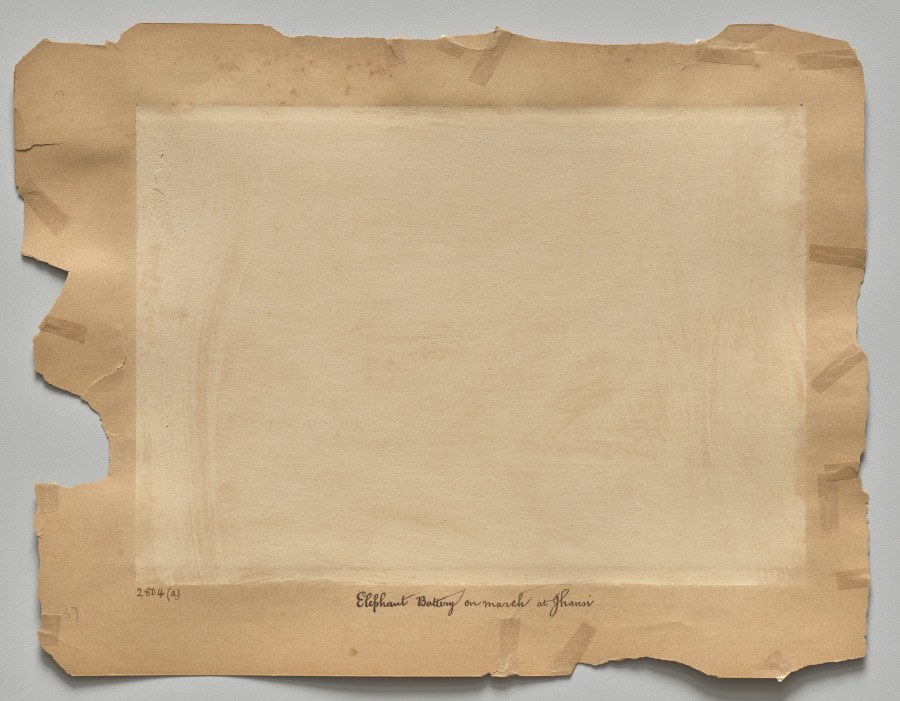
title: Elephant Battery on March at Jhansi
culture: India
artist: Raja Deen Dayal (Indian, 1844–1905)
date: c. 1882–87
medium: albumen print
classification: Photograph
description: These photographs are part of an album, now disassembled, of around 105 photographs taken in India between 1885 and summer 1887 that provide glimpses into the lives of the British colonial elite and royal and upper-class Indians. The museum holds another group of 37 pictures from this album (2016.266), which was probably commissioned by a British civil servant visiting or working in India around 1888 as a personal souvenir of his experiences there.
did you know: Raja Deen Dayal is regarded now, and was considered during his lifetime, to be India’s most important 19th-century photographer.